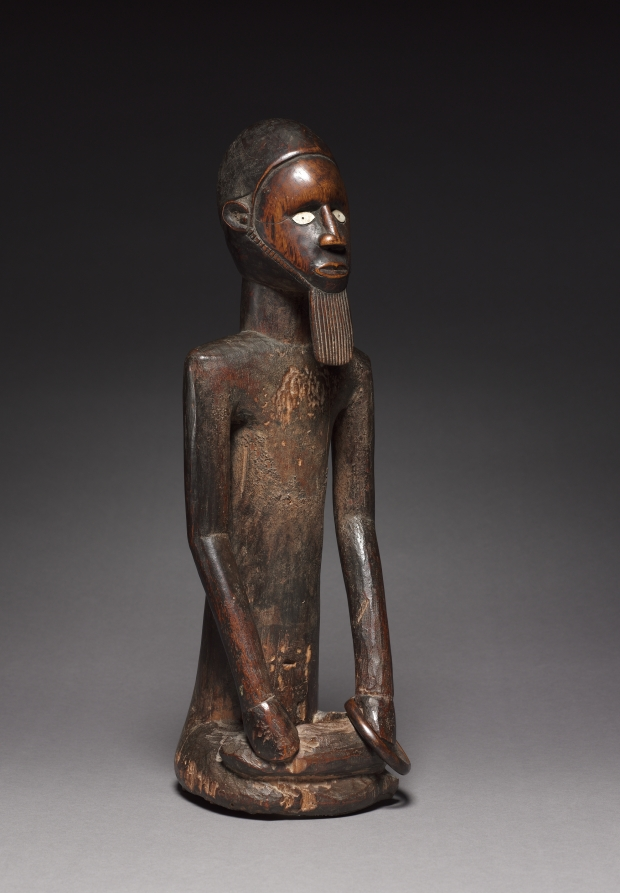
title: Male Figure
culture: Africa, Central Africa, Republic of the Congo, Beembe-style maker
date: late 1800s-early 1900s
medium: Wood, ceramic or Formica, copper alloy, and iron alloy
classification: Sculpture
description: This sculpture played a role in ancestral worship among the Beembe people. Ancestors are held in high regard among the Beembe, and this figure is thought to represent an idealized form of a deceased individual within the ethnic group. The object is one of only two seated male Beembe figures of this size in Western institutions.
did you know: This figure is considered “monumental” as most other types of Beembe figures measure about 15 centimeters tall.